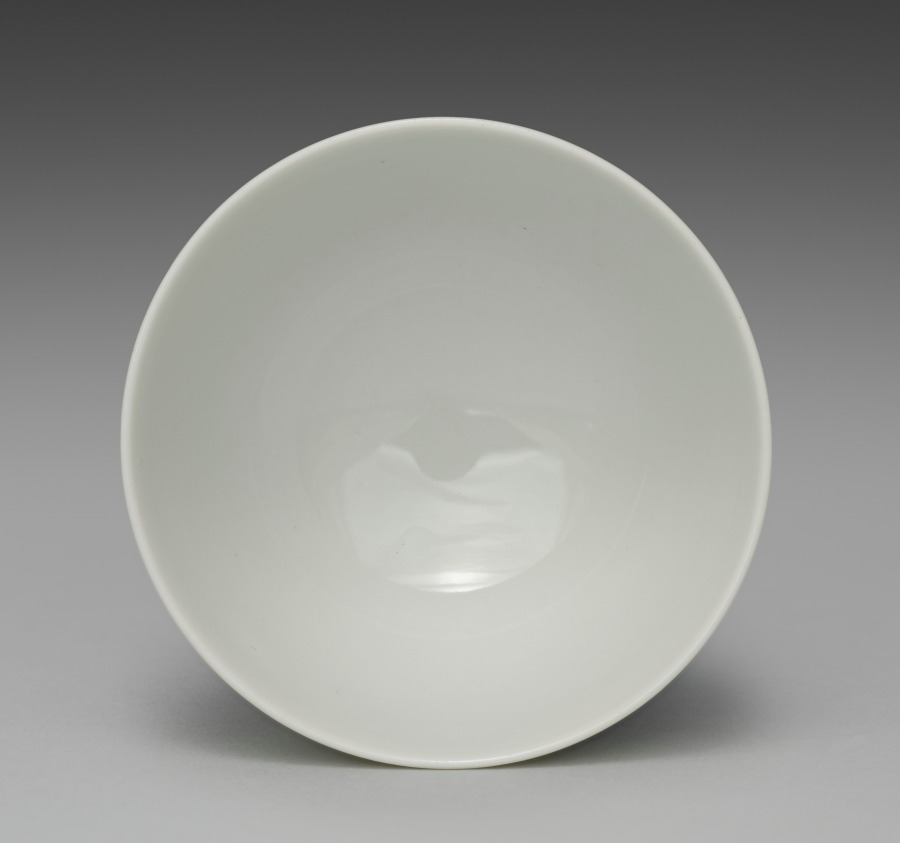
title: Teacup from Tea Set with Orchids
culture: Japan, Meiji period (1868–1912)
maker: Seifū Yohei III (Japanese, 1851–1914)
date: c. 1893–1914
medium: Porcelain with underglaze blue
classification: Ceramic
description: Although the teapot here is stored in a separate box from the five cups, these six pieces may once have been part of a tea set that included other tools such as a water cooler. The teacups have orchid flowers on both sides in underglaze blue, as well as a blue band inside the footring. The teapot has the same design and a blue band painted around the bottom of the lid’s knob. The cups’ long wood storage box is stamped on the exterior, over the lid and base, with a small red seal reading “Satō.” The same seal appears on five small squares of yellow textile, one placed in the bottom of each compartment in the teacup storage box. These are additional to the customary yellow cloths stamped with a “Seifu” seal. Interestingly, four of the Seifū cloths are stamped with an ovoid seal, while the remaining cloth, which is a slightly lighter color, has an unusual seal that is not quite gourd-shaped and with the fū of Seifū in a stylized, unrecognizable form. The teapot has its own box with a Satō seal and is wrapped with an orange textile stamped with the same unusual Seifū seal. A set with a very similar surface design is in the Brooklyn Museum. The Brooklyn set has a water cooler and a small pitcher, in addition to the teapot and cups, and all are in a single storage box. This box records the tea tools as made with kanpakuji, or “bright-jewel white porcelain,” counted among Yohei III’s most important inventions, and carved images. In fact, both sets have a white surface much closer in coloration to the cool white of porcelain clay used in Kyoto at the time, and the designs are simply painted. The Brooklyn set was thus likely mismatched at some point with a box intended for another tea set. Nonetheless, the box may have helped prevent the set’s original components from being dispersed, and the set itself provides insight into how the other tools from the present set may have looked.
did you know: This tea set with orchids has a side-handled pot called a kyūsu, used for steeping, straining, and serving tea.